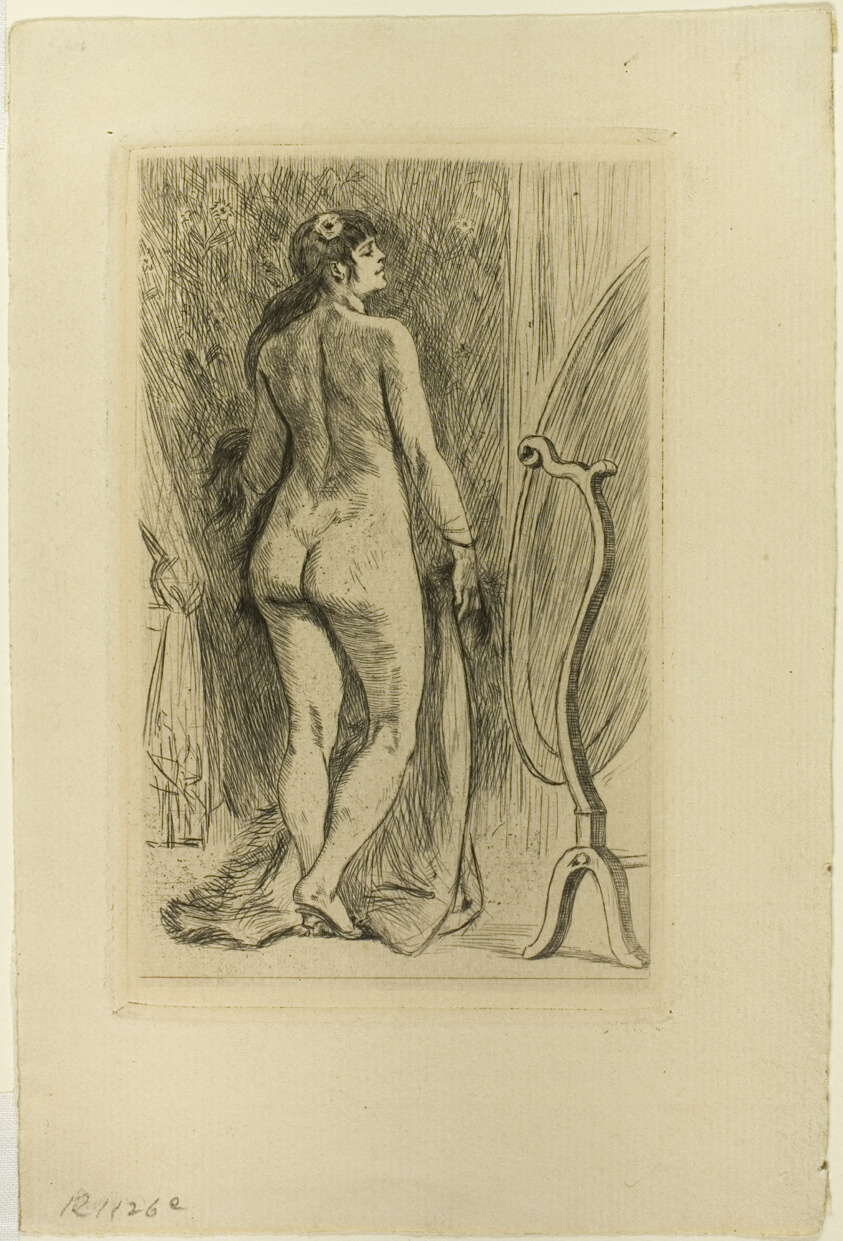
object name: Print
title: Standing Woman with a Fur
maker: Félicien Rops (Belgian, 1833-1898)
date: 1879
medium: Heliogravure, with drypoint, on cream laid paper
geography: Belgium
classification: photogravure; print; prints and drawing